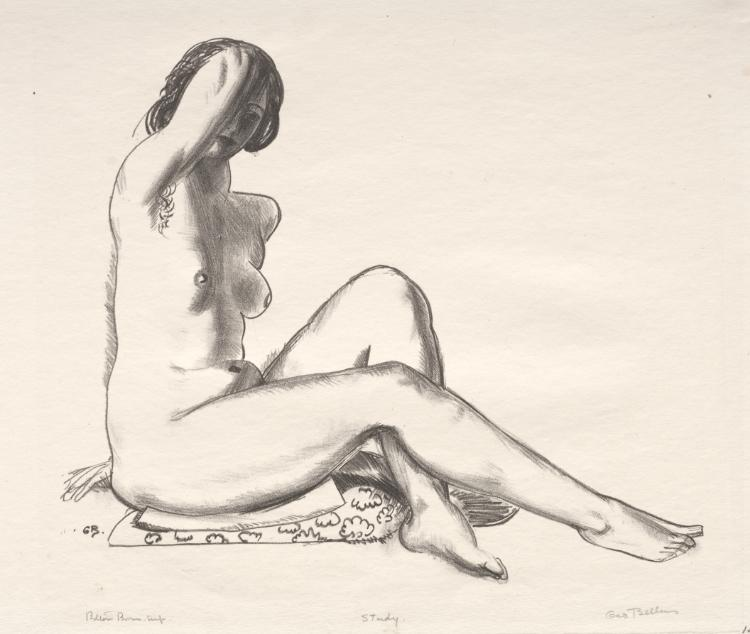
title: Nude Study, Girl Sitting on a Flowered Cushion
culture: America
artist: George Bellows (American, 1882–1925)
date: 1924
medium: lithograph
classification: Print